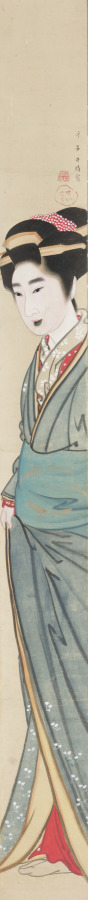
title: Courtesan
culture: Japan, Edo period (1615–1868)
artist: Gion Seitoku (Japanese, active late 1700s–early 1800s)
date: early 1800s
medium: hanging scroll, pillar painting; ink and color paper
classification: Painting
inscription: Artist's signature and two seals upper right side.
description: This narrow hanging scroll, known as a pillar painting, is similar to the format of Shigemasa’s Two Beauties (see CMA 1985.274).